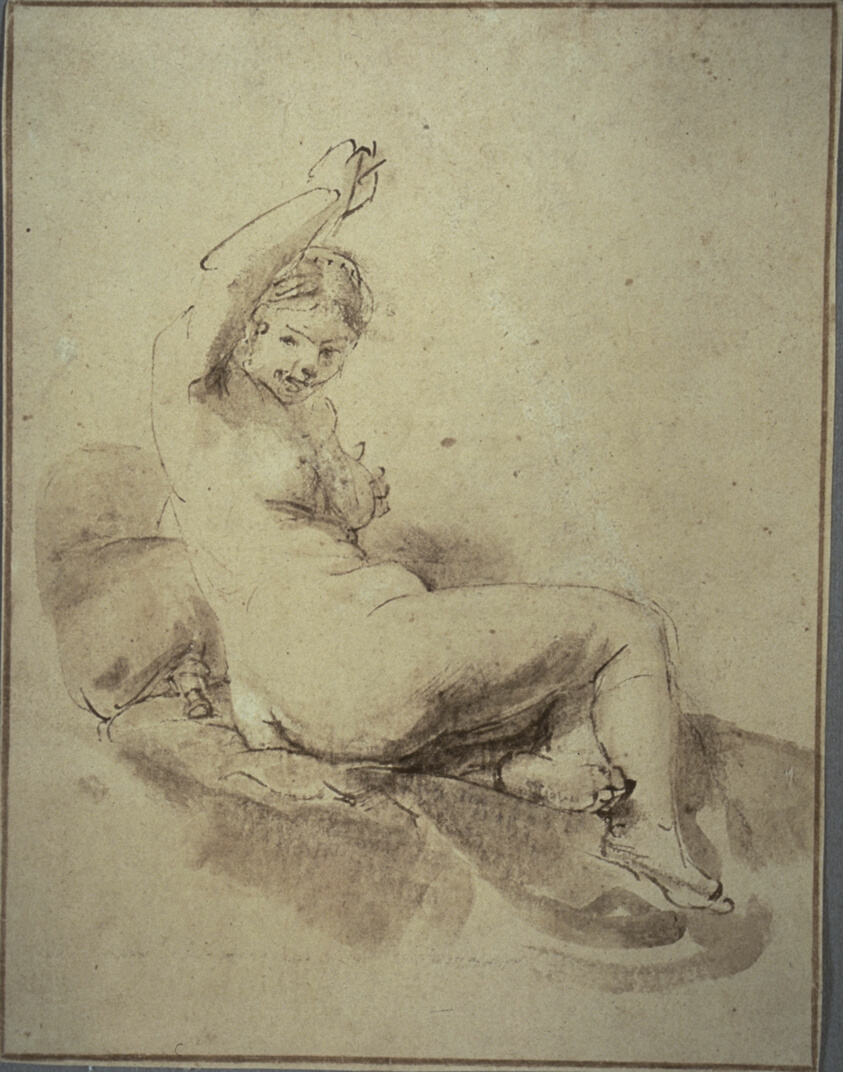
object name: Drawing and Watercolor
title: Female Nude Reclining with Arm Raised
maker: Attributed to Aert de Gelder; Dutch, 1645-1727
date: c. 1665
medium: Pen and brown ink and brush and brown wash on tan laid paper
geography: Netherlands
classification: pen and ink drawings; drawings (visual works); prints and drawing